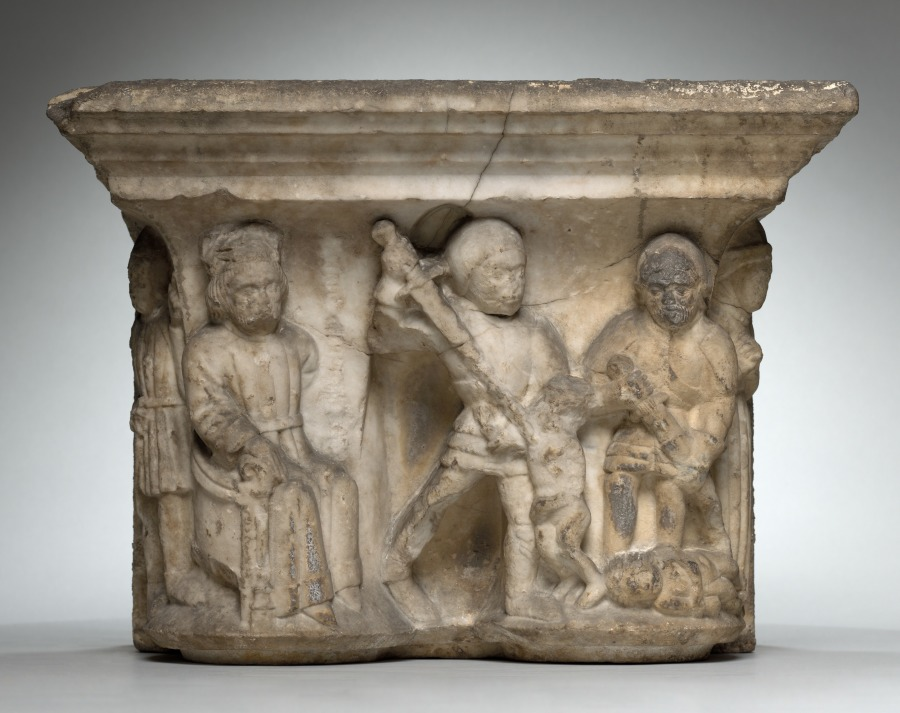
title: Engaged Capital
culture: Southern France, Abbey of Larreule, near Tarbes, 15th century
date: 1400s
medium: limestone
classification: Sculpture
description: This capital belongs to a surviving group including other architectural fragments that once decorated the cloister of the Abbey of Larreule. A cloister was a covered walkway or arcade, usually around all four sides of a square area of grass (the "cloister garth"). The seclusion of the cloister was the monks’ exclusive domain, off limits to others. Here, the monks were supposed to pray, study, meditate, and exercise in privacy and solitude. Such cloister capitals served both to instruct the monks and as a focus for their devotions. Other capitals in this series are installed in the Jardin Massey at Tarbes, near the original abbey. An arch from Larreule has been assembled with other associated French capitals at The Cloisters in New York.